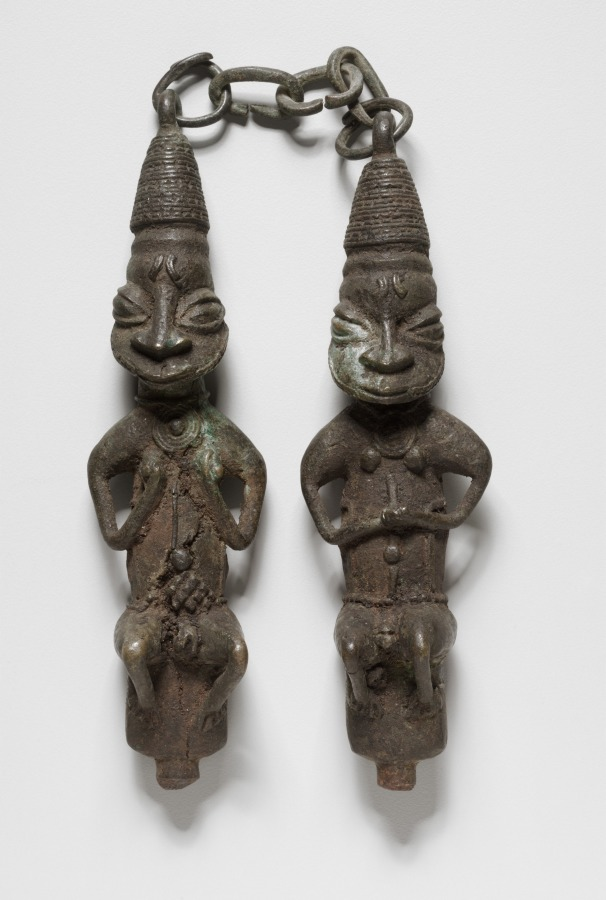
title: Pair of Ritual Staffs (ẹdan Ògbóni)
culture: Africa, West Africa, Nigeria, Yorùbá-style maker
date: possibly 1800s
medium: Copper alloy and iron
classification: Sculpture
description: The chain connecting these two figures allows them to be worn in public by a member of the Ògbóni or Òṣùgbó association as authority emblems. The male on the right gives the association’s typical salute by clasping his left fist on the right one, while the female on the left holds her breasts as a sign of welcome and generosity. The use of copper alloy and iron expresses Ògbóni/Òṣùgbó's concerns with longevity and durability.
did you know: Imagine how this would look when its owner wore it; the chain would go around the back of the neck and the figures would rest on their chest.